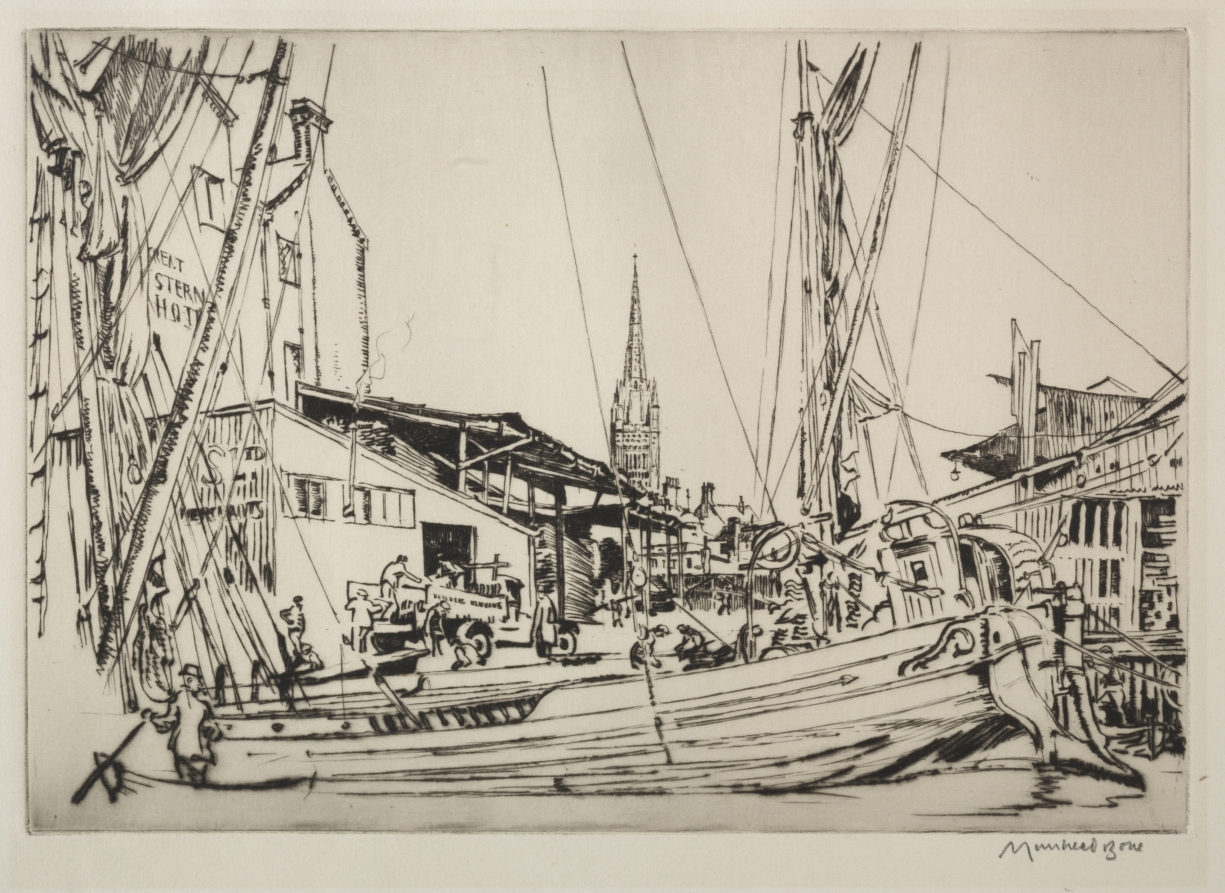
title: Norwich Cathedral Spire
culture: England, 20th century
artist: Muirhead Bone (British, 1876–1953)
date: 1937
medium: drypoint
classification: Print